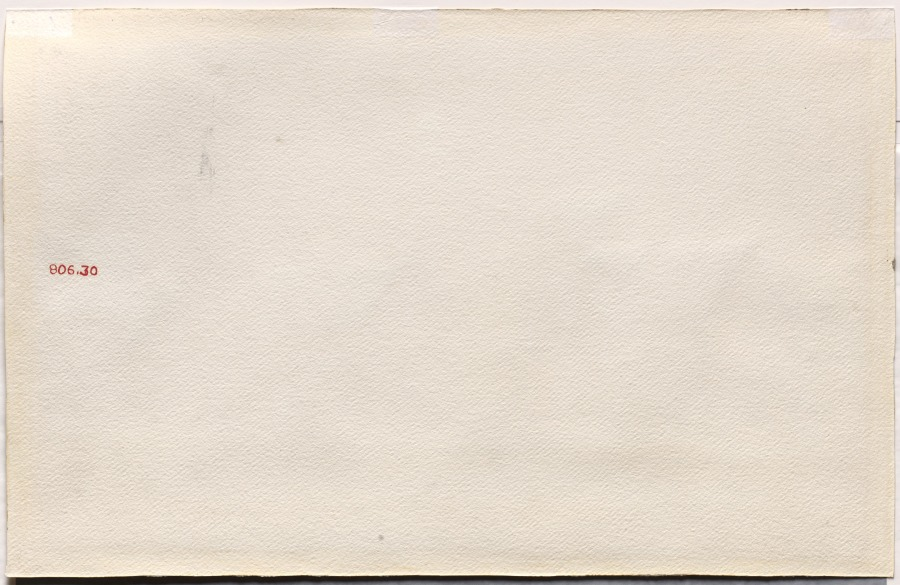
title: Lighthouse Village (also known as Cape Elizabeth)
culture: America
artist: Edward Hopper (American, 1882–1967)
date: 1929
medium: watercolor with gouache over graphite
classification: Drawing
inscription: signed, lower right, in black gouache: Edward Hopper / Cape Elizabeth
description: Edward Hopper made this watercolor during the last of several painting excursions that he took to Maine. He had painted the lighthouse at Cape Elizabeth once two years before, but found the structure so interesting that he returned to it in this drawing. Hopper was especially attracted to the varying green tones of the grass and the combination of buildings, each with a different purpose, including one where the lighthouse keepers slept and the three at the bottom where coast guard families lived. He used a slightly different tone of watercolor for each of the structures to accurately convey the reflection of light on them.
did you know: In an interview published in 1962, Edward Hopper described this watercolor's setting, saying that "I like Maine very much but it gets so cold in fall."